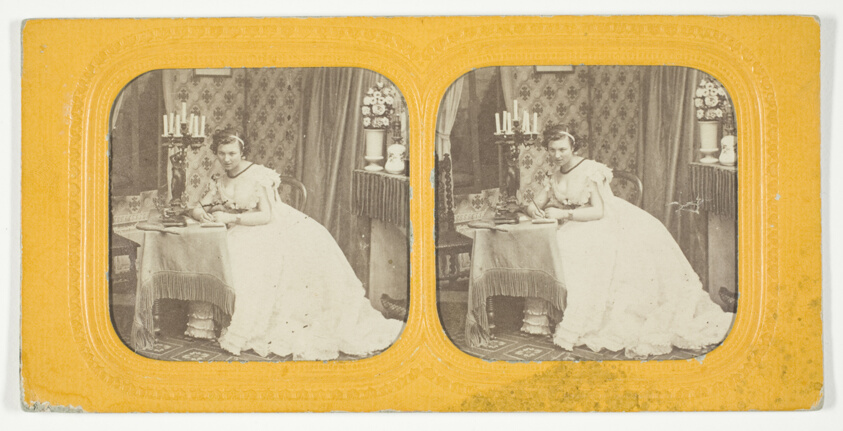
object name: Photograph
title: Untitled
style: 19th century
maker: Artist unknown; European, late 19th century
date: 1875/99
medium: Albumen print, stereo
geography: Western Europe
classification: photography; photograph